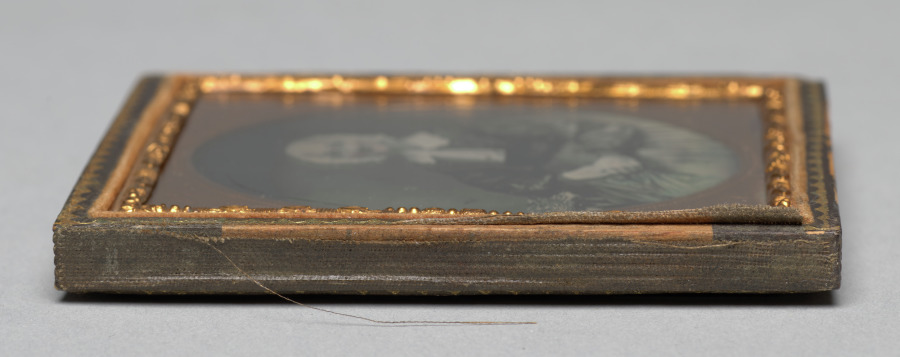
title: Seated old woman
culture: America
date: c. 1864–65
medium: ambrotype, tinted, sixth plate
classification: Photograph